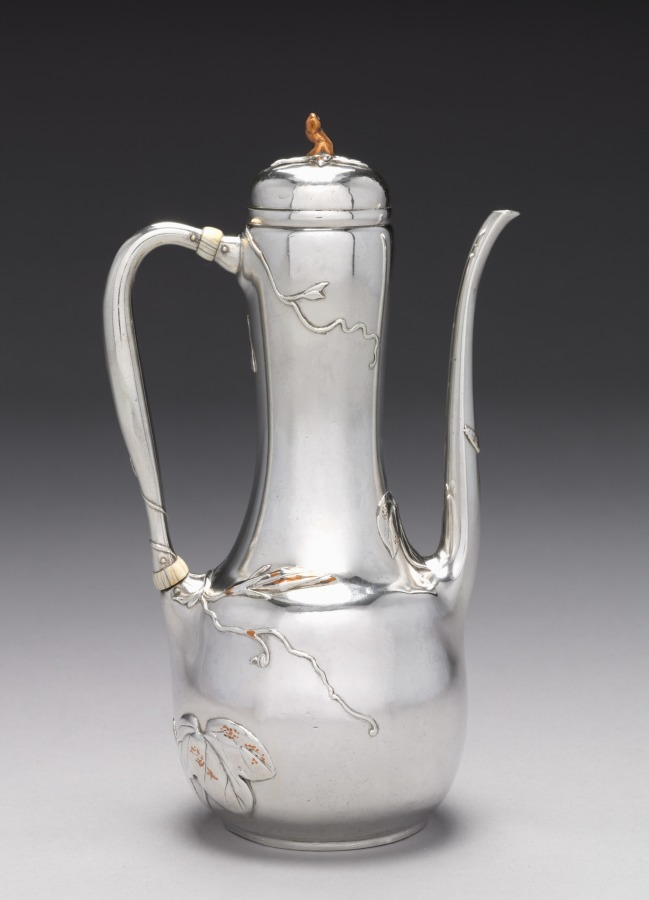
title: Coffee Pot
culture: America, New York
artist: Tiffany & Co. (America, New York, est. 1837)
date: c. 1879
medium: silver inlaid with copper and gold, ivory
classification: Silver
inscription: engraved: E.J.W.B.\from\A.M.\Xmas 1879. (The A.M. may refer to Alfred Morrison, a wealthy man who supported contemporary decorative arts by collecting them for his London house.)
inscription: Stamped underside: "Tiffany + Co.\ 5401 Makers 441\ Sterling Silver\ -and-\ other metals\ 907